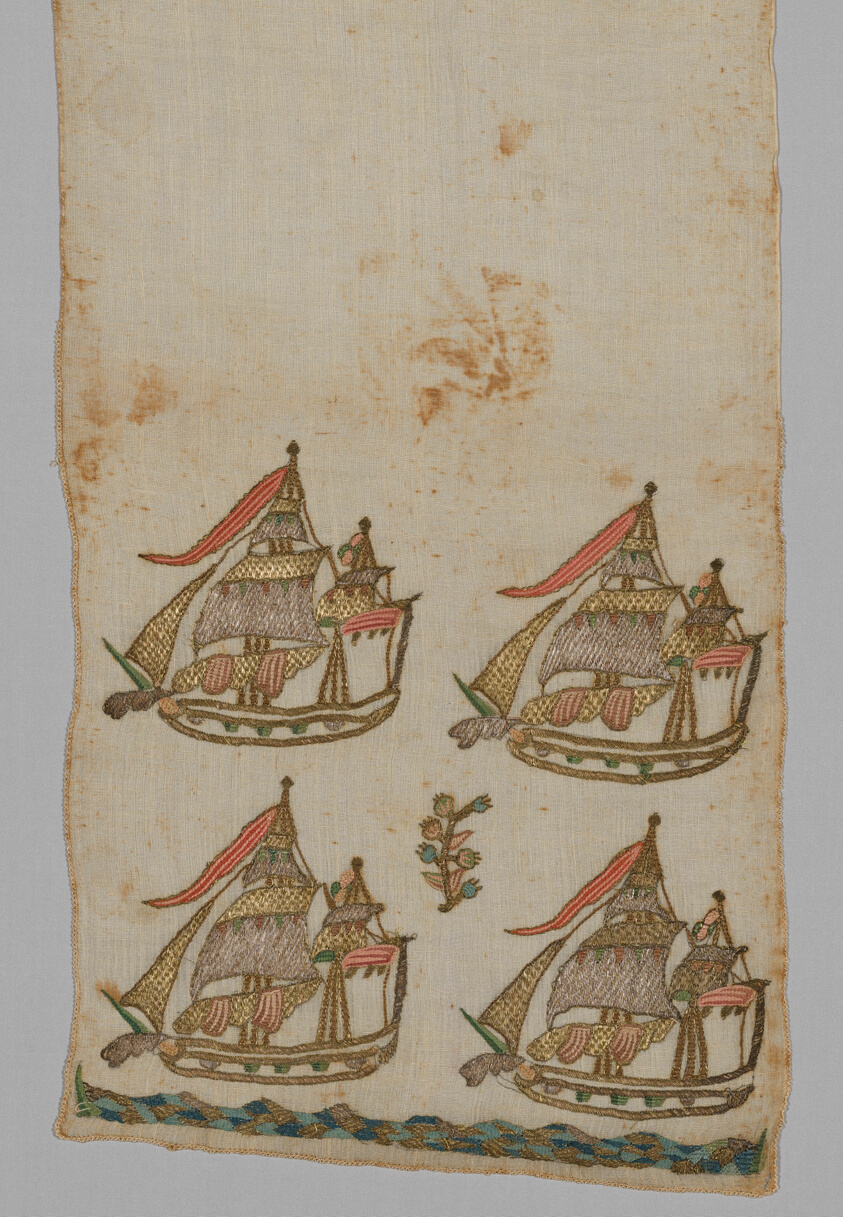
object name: Costume and Accessories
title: Sash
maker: Turkey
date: 19th century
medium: Cotton, plain weave; embroidered with silk, gilt- and silvered-metal-strip-wrapped silk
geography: Turkey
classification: textile; weaving; needlework (visual works); costume; dress (garment); clothing